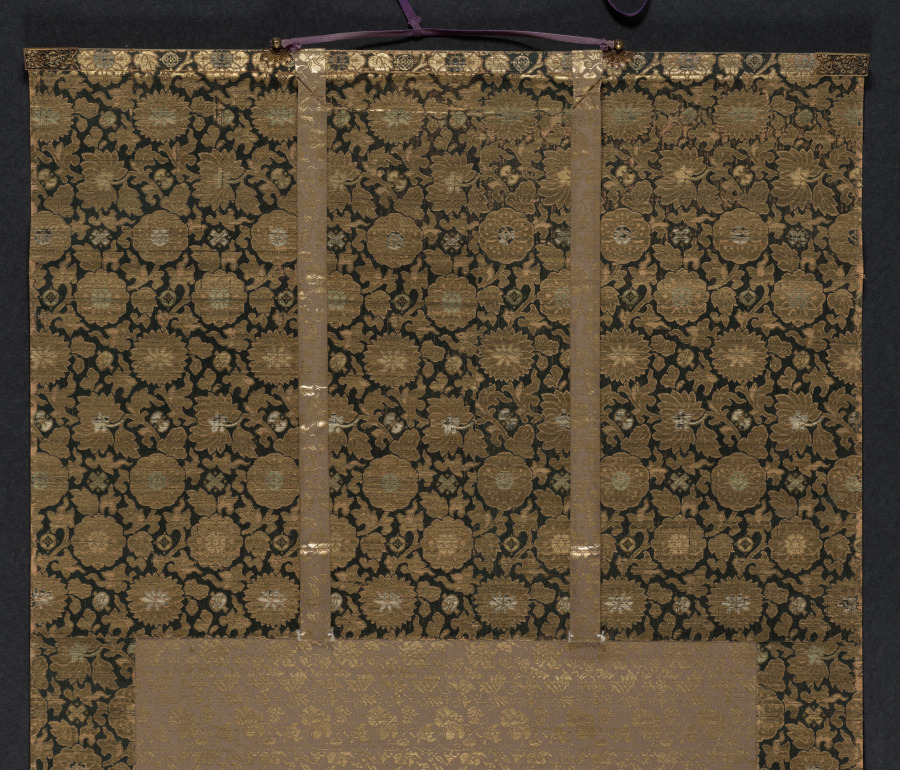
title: Seated Arhat with Two Attendants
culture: China, Southern Song dynasty (1127-1279)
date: late 1200s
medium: Hanging scroll; ink and color on silk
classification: Painting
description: Arhat, or Lohan (羅漢 in Chinese), were the disciples of the historical Buddha. Later tradition tended to picture them in sets of 16, 18, or as many as 500. This is one painting from a larger set, with a seated arhat portrayed on a grand scale, overshadowing his own attendant as well as the ferocious figure who approaches him with an offering of a wild goose.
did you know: The arhat holds a rolled up scroll, likely a sutra, and is seated before a standing screen decorated with a landscape painting.